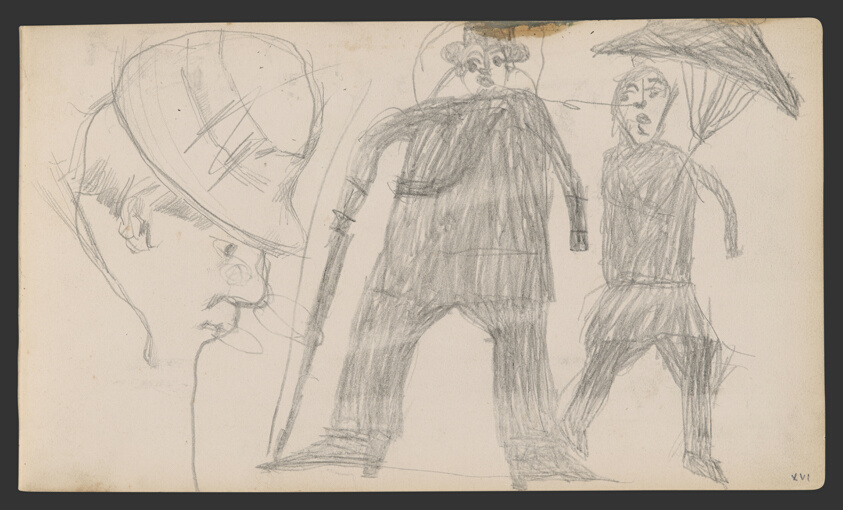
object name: Drawing and Watercolor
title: Sketchbook No. 2 (L'Estaque)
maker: Paul Cézanne; French, 1839-1906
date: 1875–86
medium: Graphite and pen and ink drawings on paper, bound into a book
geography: France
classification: sketchbook; graphite; prints and drawing; paper